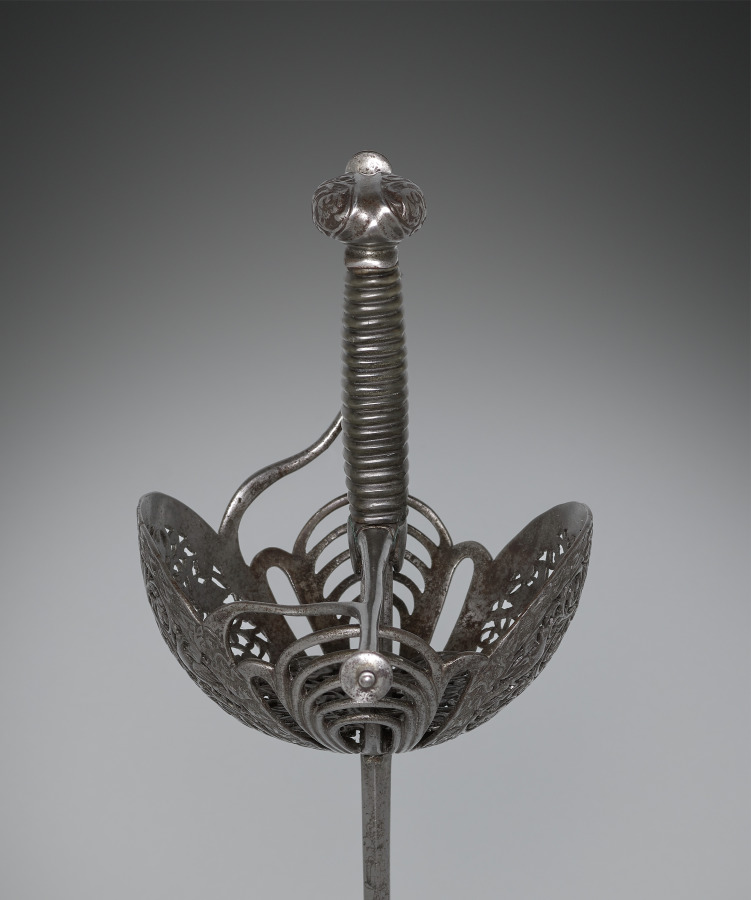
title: Rapier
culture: Spain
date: c. 1650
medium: steel, pierced and chiseled, leather and wood grip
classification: Arms and Armor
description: The rapier was a sword worn with civilian dress and used in duels. The term rapier derives from a 16th-century French word rapière, which in turn derived from the Spanish espada ropera, or “dress sword.” The rapier was a light weapon with a straight double-edged and pointed blade that, with the development of the art of fencing in the 1500s and 1600s, gradually became narrower and lighter, and thus suitable for thrusts only. With the new technique of swordplay emphasizing the point of the blade, sword guards became more complex to protect the duelist’s unarmored hand. These elaborate guards were frequently decorated by various techniques—chiseling, bluing, russeting, and damascening.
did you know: Many civilians wore swords for self defense and for settling disputes by dueling; the swords often reflected contemporary taste and fashion.